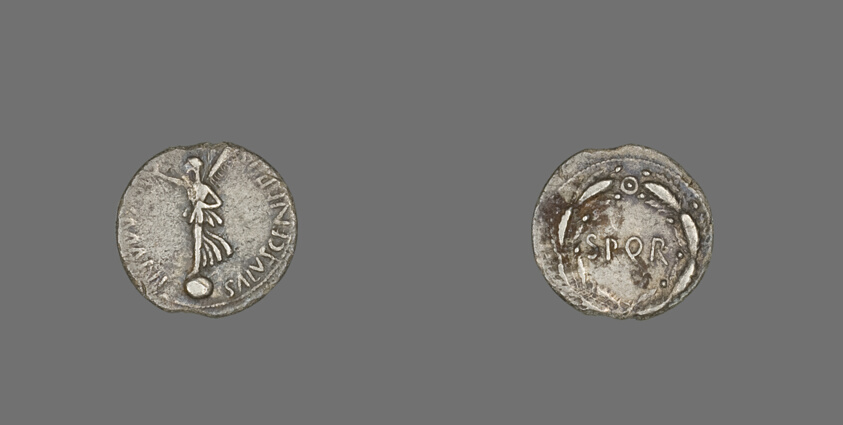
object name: Coin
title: Denarius (Coin) Depicting the Goddess Victory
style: roman (ancient, style or period), ancient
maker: Roman, minted in Gaul (now France)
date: 68-69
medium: Silver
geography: Italy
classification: coin; ancient art; struck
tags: goddesses